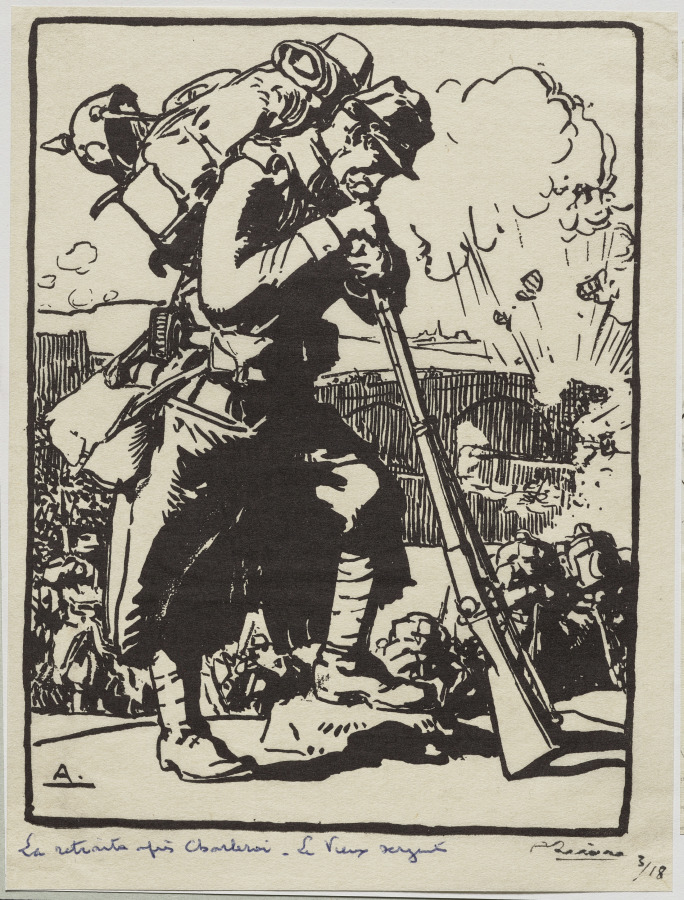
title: La Retraite après Charleroi...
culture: France, 20th century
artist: Auguste Louis Lepère (French, 1849–1918)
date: 1914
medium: pencil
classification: Drawing